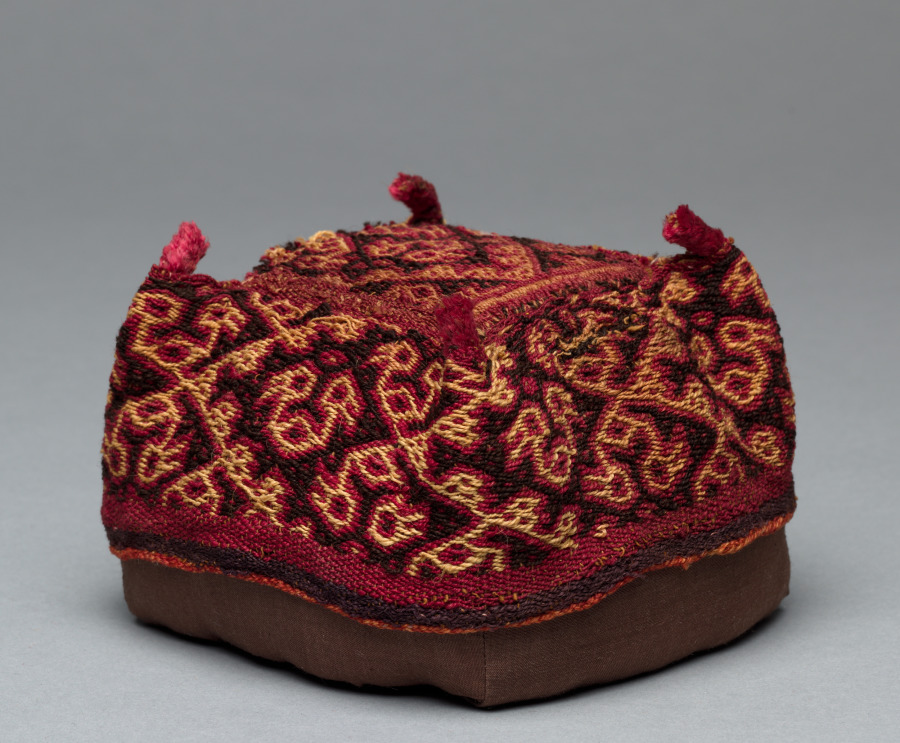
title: Four-Cornered Hat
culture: Peru, South Coast, Ica Valley, Inca Culture, 15th-16th century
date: c. 1400–1532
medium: camelid fiber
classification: Textile